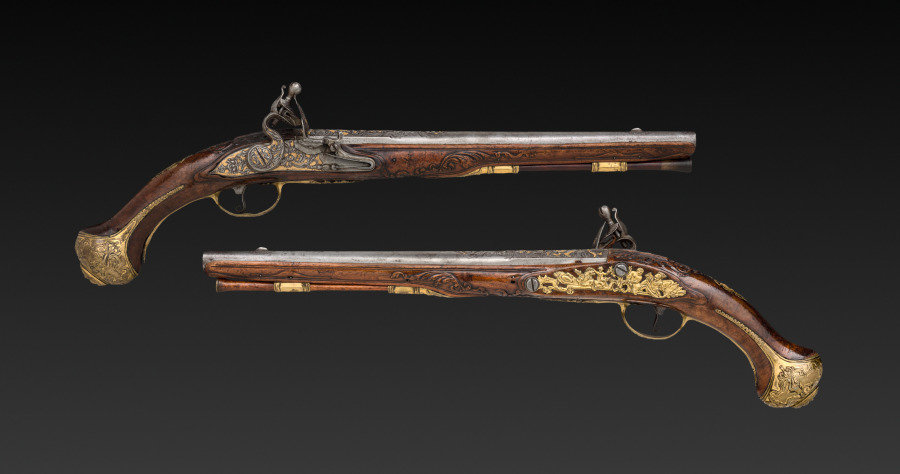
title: Pair of Flintlock Pistols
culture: Franco-Flemish, Liège, early 18th century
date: early 1700s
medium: steel with gold inlay, gilt-brass mounts; walnut burl stock; chiseled high-relief decoration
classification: Arms and Armor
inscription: G. MASSIN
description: Works of exquisite craftsmanship, this pair of pistols, on view in the museum’s armor court, feature an array of decorative elements, including carved walnut, gold inlay, and chiseled, engraved, and gilded figural designs. The barrel is signed G. MASSIN, the name of a gunsmith working in eastern France or French-speaking Flanders, possibly the city of Liège.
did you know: The flintlock ignition system was developed in the 1600s and remained the dominant system until the early 1800s.